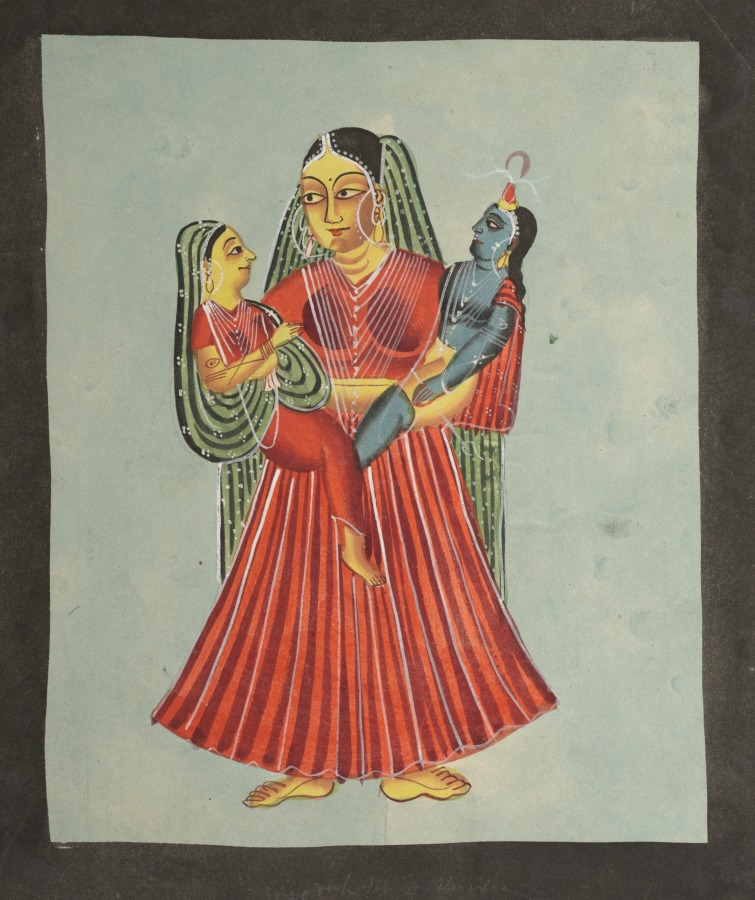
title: Yasoda Holding Krishna and Radha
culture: Eastern India, Bengal, Kolkata, Kalighat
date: c. 1890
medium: Gum tempera, graphite, ink, and tin on paper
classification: Painting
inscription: [[recto, lower margin]] Yasudah taking her son and his wife (Krishna and his wife)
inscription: [[recto, upper right]] X 17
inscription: [[verso, upper right]] 8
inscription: [[verso, lower right]] Saoo HSE 1/70